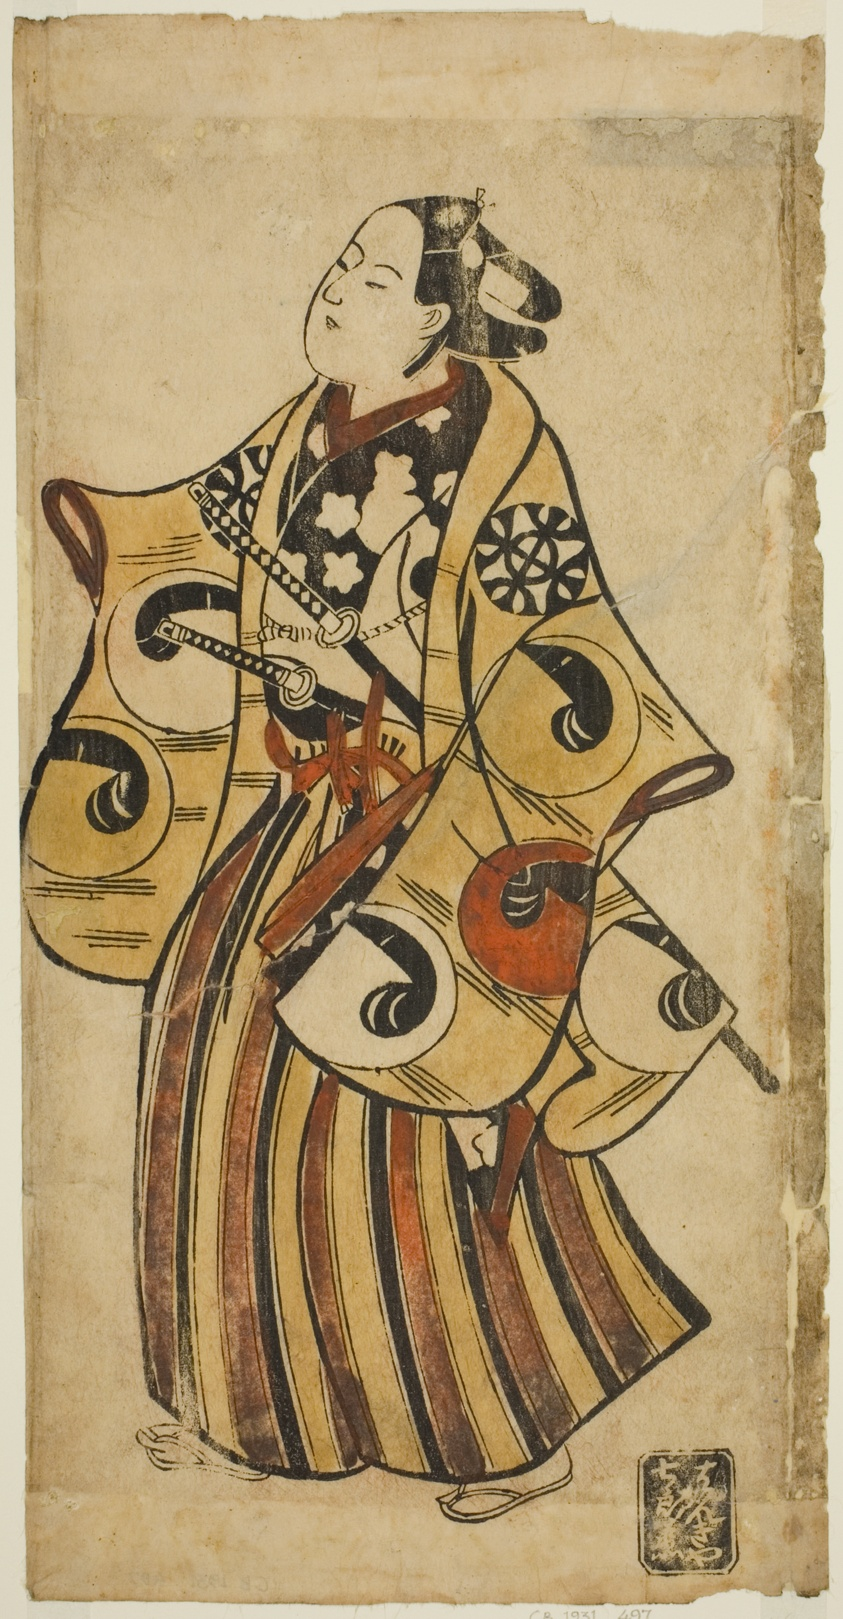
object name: Print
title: The Actor Nakamura Denkuro I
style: Japanese (culture or style)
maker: Attributed to Torii Kiyonobu I; Japanese, 1664-1729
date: c. 1710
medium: Hand-colored woodblock print; hosoban, tan-e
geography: Japan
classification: woodblock print; print; asian art